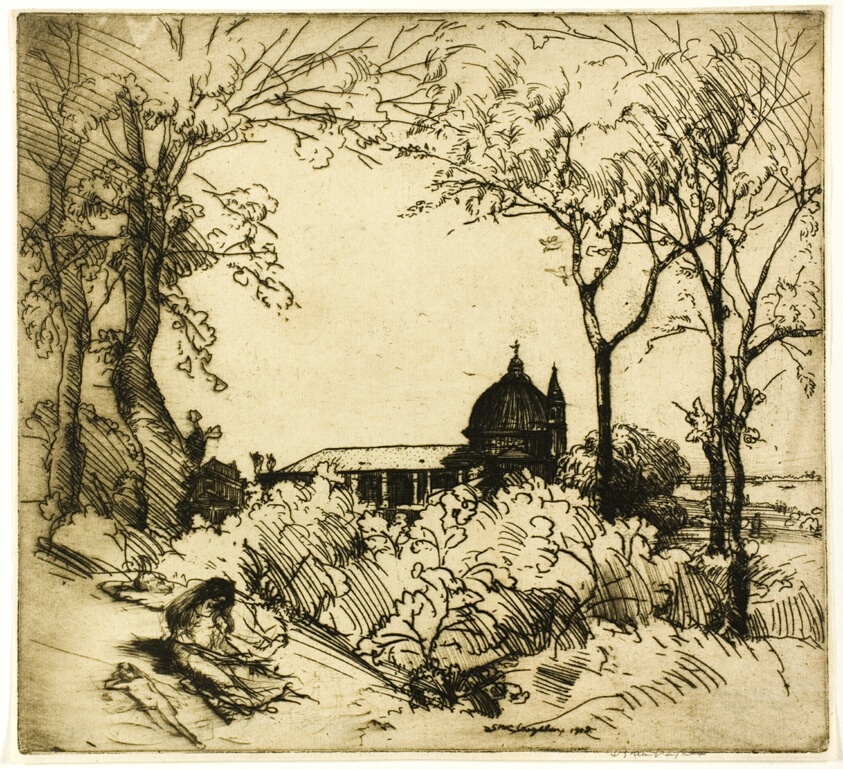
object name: Print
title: Idillio, Venice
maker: Donald Shaw MacLaughlan (American, born Canada, 1876-1938)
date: 1908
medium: Etching with drypoint in black on cream laid paper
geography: United States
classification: etching; print; prints and drawing